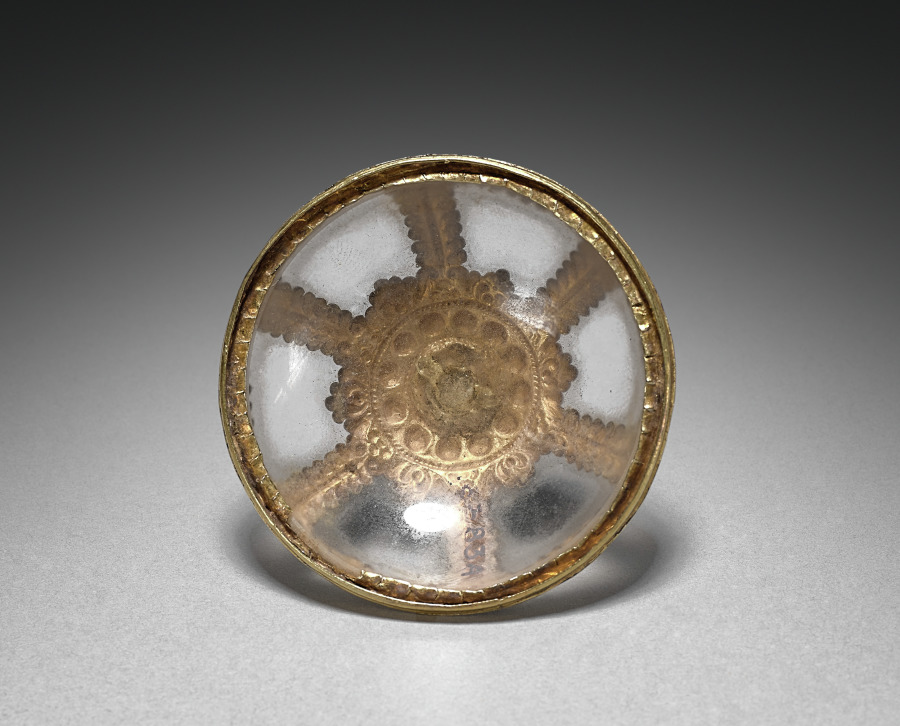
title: Box, with Top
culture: Java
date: 20th Century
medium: glass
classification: Glass